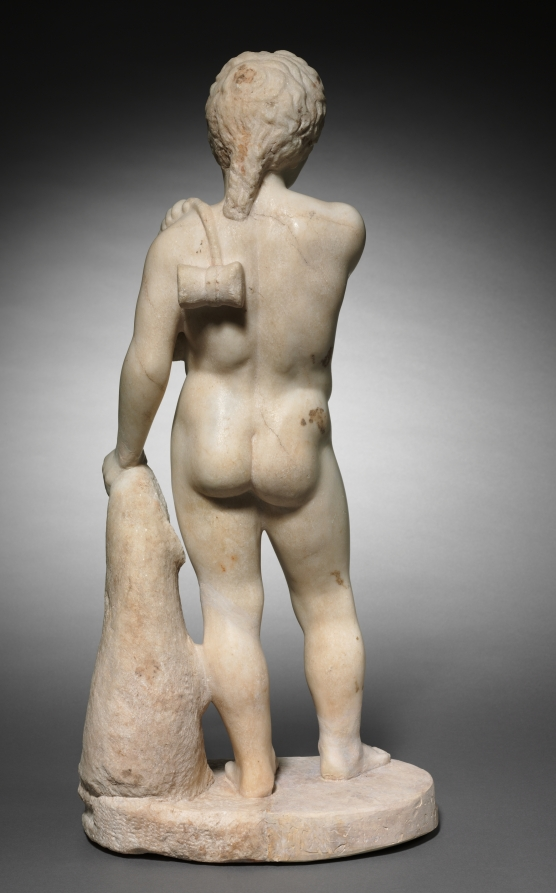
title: Youth with Jumping Weights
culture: Italy, Rome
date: c. 40–70 CE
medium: marble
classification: Sculpture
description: The hourglass-shaped jumping weights slung over his shoulder, together with the animal-skin punching bag on which he leans, characterize this youth as an athlete. The distinctive haircut, short with one long tress in back, may indicate a childhood vow, perhaps to be trimmed in a future ceremony. Several very similar sculptures exist in other collections, suggesting the existence of a single prototype, now lost.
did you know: The lower right leg and foot of this sculpture do not survive, and have been reconstructed.